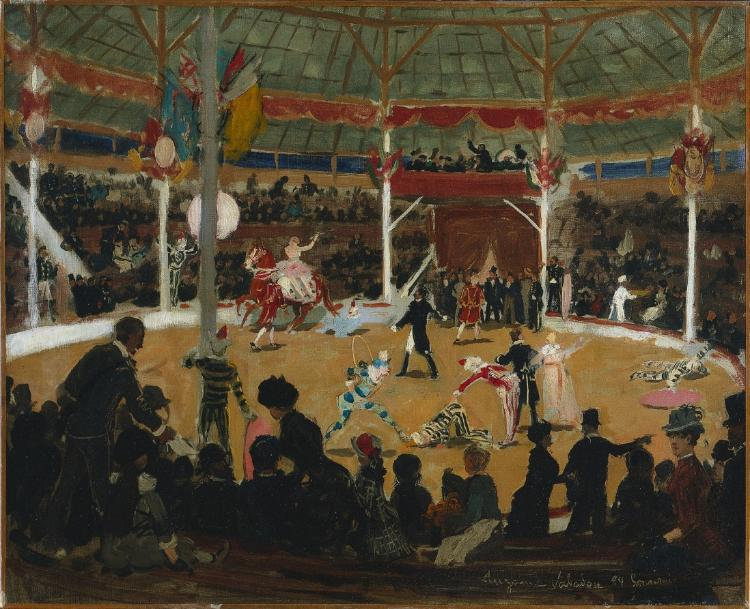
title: The Circus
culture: France, 19th century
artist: attributed to Suzanne Valadon (French, 1865–1938)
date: 1889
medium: oil on fabric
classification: Painting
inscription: Signed lower right, carved into wet paint with blunt end of brush: Suzanne Valadon 89 Souvenir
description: The attribution of this painting to Suzanne Valadon has been rejected by several authorities. Others support the attribution, arguing that the painting is merely atypical because it is an early work, signed and dated 1889. Valadon did not begin to develop her mature style until 1891.She was the mother of artist Maurice Utrillo and a prolific painter herself, although she never received any formal artistic training.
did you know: Besides being a prolific painter, Suzanne Valdon served as the model for Pierre-Auguste Renoir and Henri de Toulouse-Lautrec.